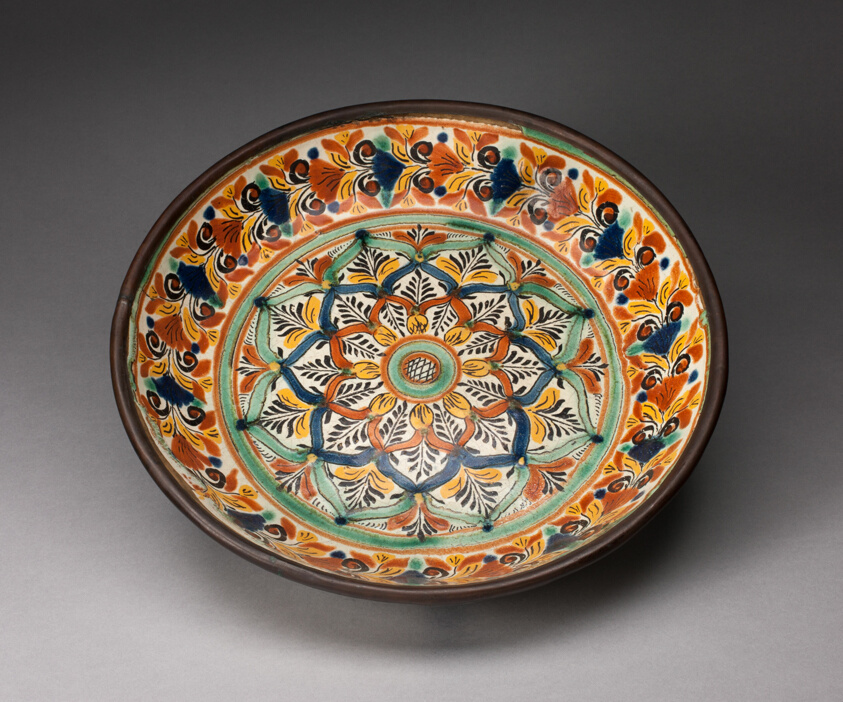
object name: Vessel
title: Plate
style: spanish colonial, european, Arts of the Americas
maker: Talavera poblana; Puebla, Mexico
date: 1800–50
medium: Tin-glazed earthenware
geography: Puebla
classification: earthenware; european decorative arts; ceramics; vessel; art of the americas